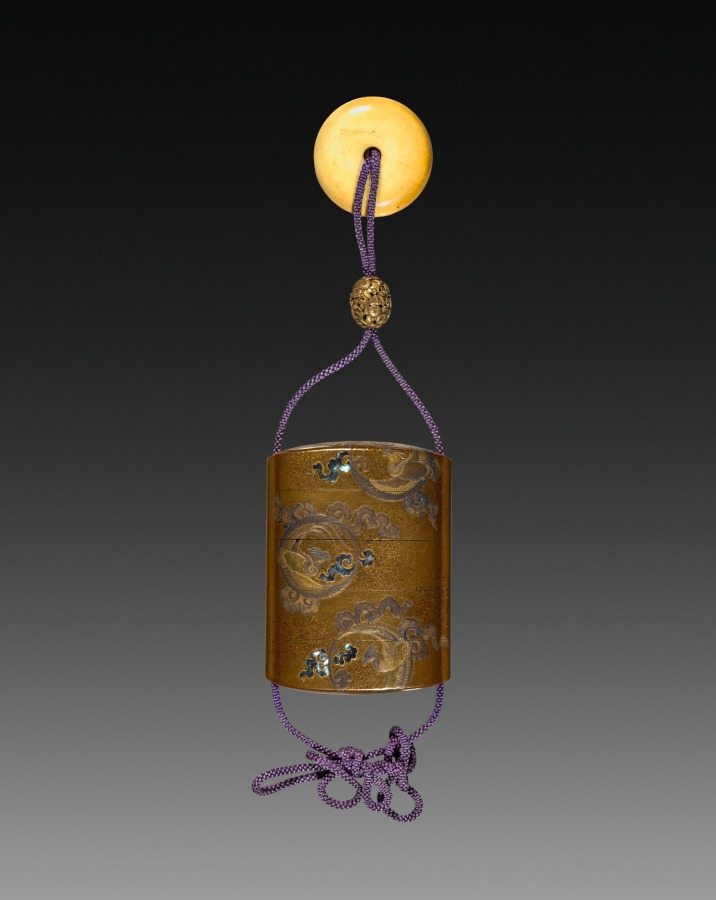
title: Inro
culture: Japan, Edo period (1615–1868)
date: 1750–99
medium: lacquer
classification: Lacquer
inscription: Signature: Kajikava